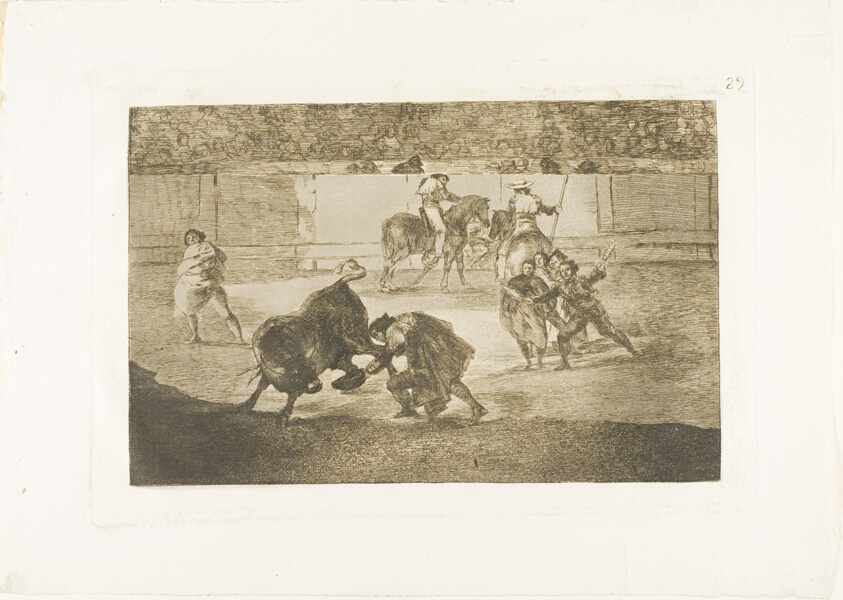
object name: Print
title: Pepe Illo making the pass of the 'recorte', plate 29 from The Art of Bullfighting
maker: Francisco José de Goya y Lucientes (Spanish, 1746-1828)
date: 1815, published 1816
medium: Etching, burnished aquatint, drypoint and burin on ivory laid paper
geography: Spain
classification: etching; print; prints and drawing